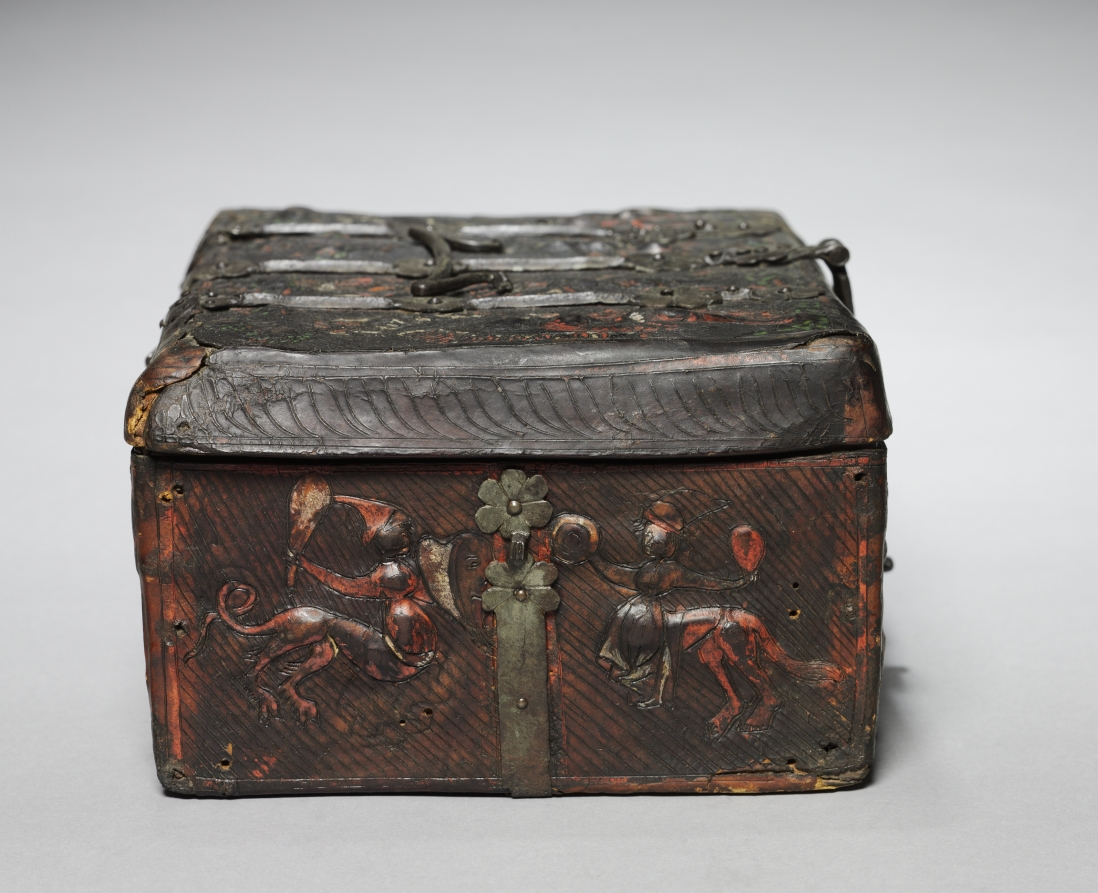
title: Leather Casket with Scenes of Courtly Love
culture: France, Gothic period, 2nd half of the 14th century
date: c. 1350–1400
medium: Leather: embossed, incised; iron mounts; wood core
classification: Leather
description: During the Middle Ages, small boxes like this were produced for the secular market. Used for storing personal items, the boxes typically consisted of a wood core that might be decoratively painted and gilded or covered with another material, such as ivory or leather. Manufactured in small, highly specialized leather workshops, these richly embellished caskets were valued furnishings in the homes of the aristocratic clientele that commissioned them. On the lid of this box, a couple is shown with banderoles inscribed in Old French with expressions of mutual love. "Hold my heart," requests the lady. "But you already have it," replies the man. On the front of the casket, the man, holding a heart, appears again and states, "Have it once more."